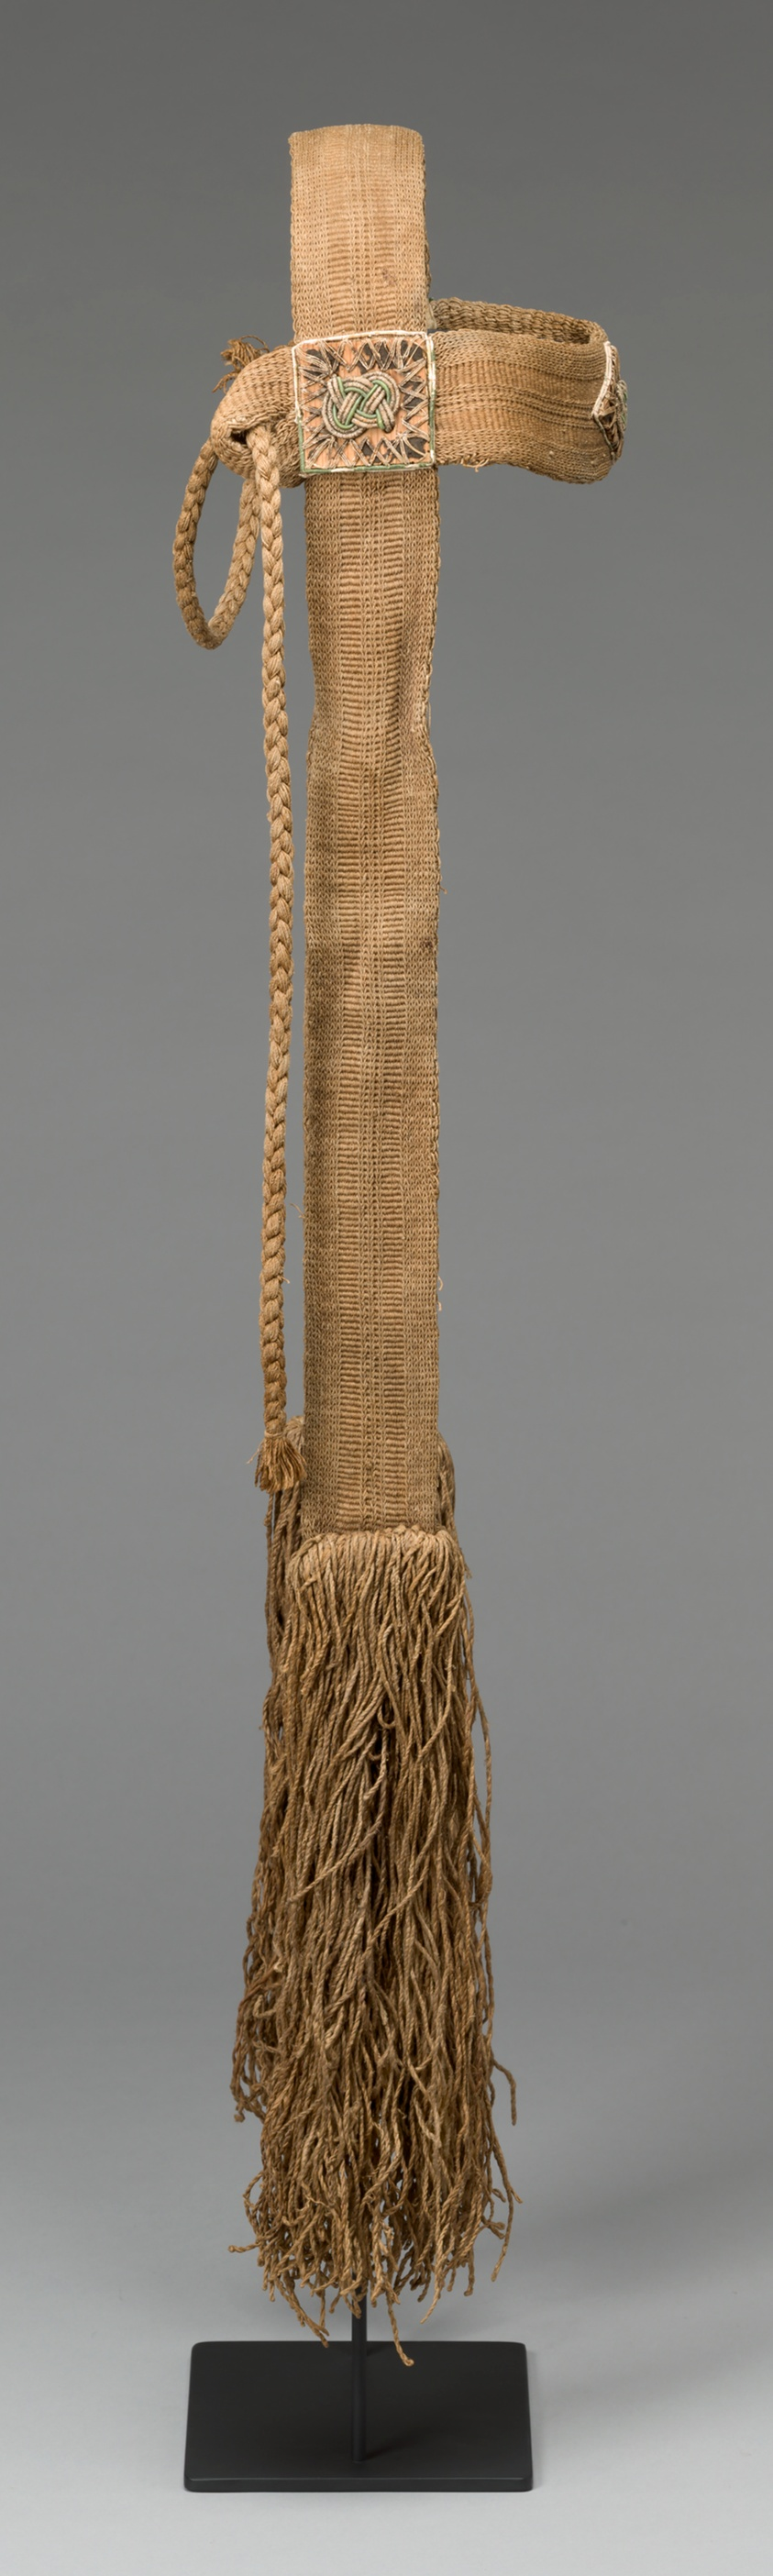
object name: Costume and Accessories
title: Ceremonial Headdress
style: ainu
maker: Ainu (Hokkaidō, Japan)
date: Edo period (1615–1868), first half of the 19th century or earlier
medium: Bast fiber, gilt-paper-wrapped silk, silk, and wood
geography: Hokkaido region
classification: costume accessory - headdress; costume; headdress